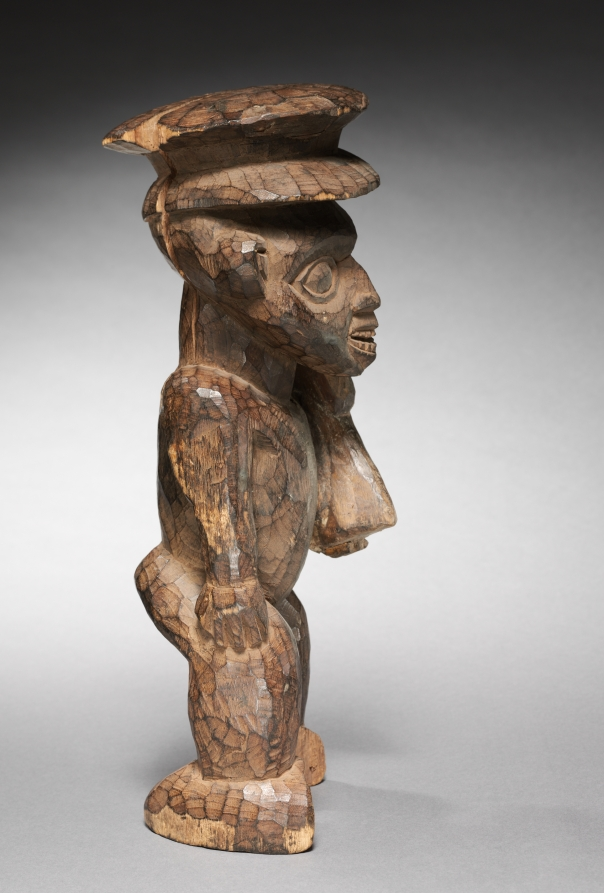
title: Male Figure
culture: Africa, Central Africa, Cameroon, Grassfields region, unidentified maker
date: c. 1905–10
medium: wood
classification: Sculpture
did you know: The weapon this figure holds is a later replacement added in Ohio.